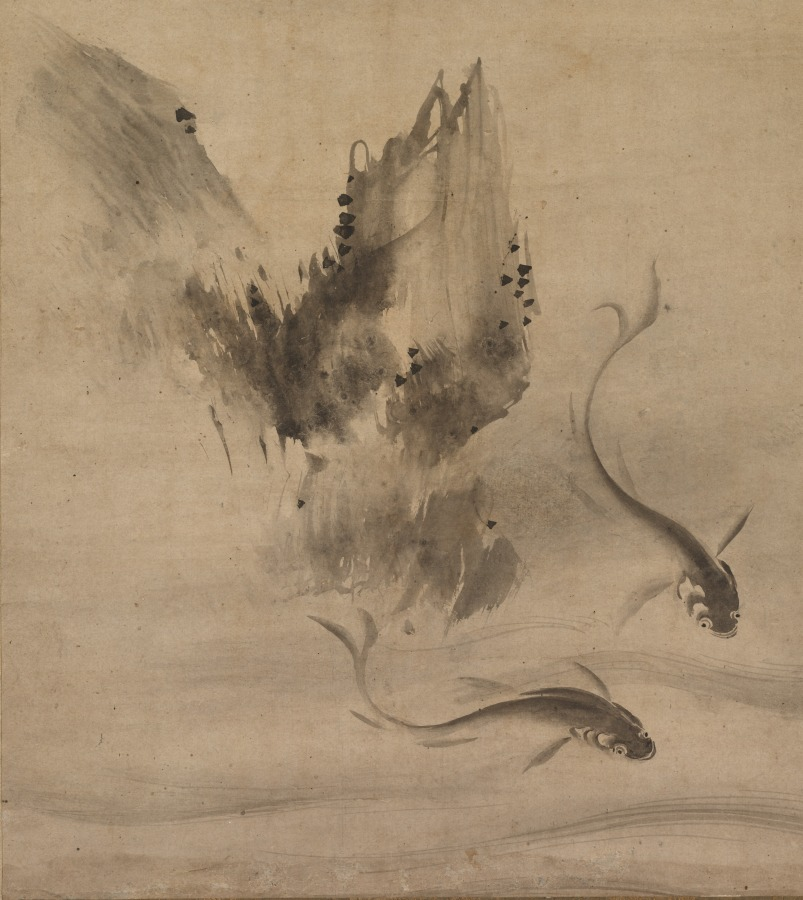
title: Fish and Rock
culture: Japan, Momoyama period (1573–1615)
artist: Rinkyo (Japanese)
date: 1573–1615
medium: one of a pair of hanging scrolls; ink on paper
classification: Painting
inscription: artist's seal at mid-left edge of painting.